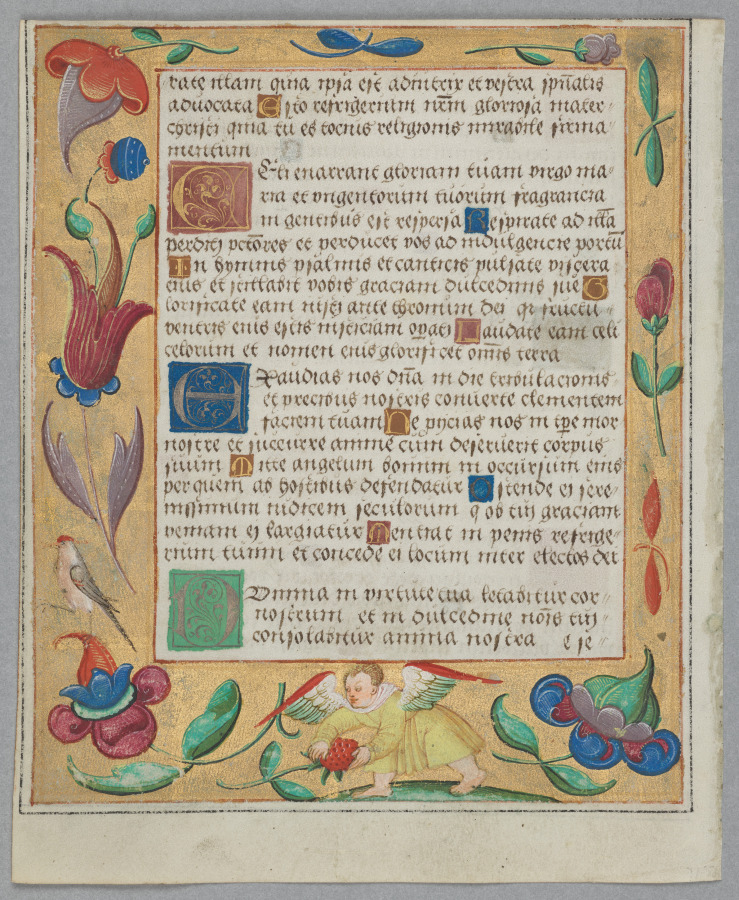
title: Leaf from a Psalter and Prayerbook: Putto Picking Strawberries (verso)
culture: Germany, Hildesheim (?), 16th century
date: c. 1524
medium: Ink, tempera and liquid gold on vellum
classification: Manuscript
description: This leaf from a psalter and prayerbook is intricately decorated and was probably produced for use in a private noble family. The prominent mention of Saint Godehard (died 1038), Bishop of Hildesheim, in the original manuscript suggests that it was produced for use in the diocese of Hildesheim (Norther Germany).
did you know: The museum currently owns three doublesided leaves from the same manuscript.